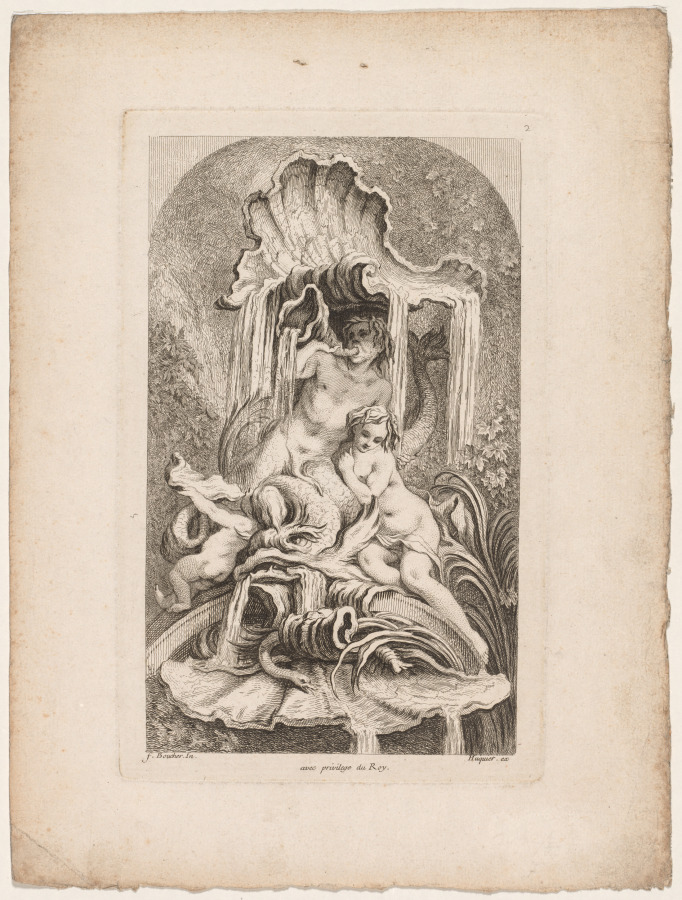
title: Book of Fountains: No. 2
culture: France, 18th century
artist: Gabriel Huquier (French, 1695–1772)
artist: after François Boucher (French, 1703–1770)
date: c. 1736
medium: etching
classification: Print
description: Boucher was one of the most prolific designers of ornament prints. With their aquatic motifs and gracefully curving and scalloped forms, these designs for fantastic, even bizarre fountains perfectly illustrate the whimsical Rococo approach. Derived from the French word for shell, rocaille, the Rococo was a light, playful style filled with shell motifs (which stemmed in part from a vogue for collecting shells), naturalistic curves, scrolls, and plant forms.